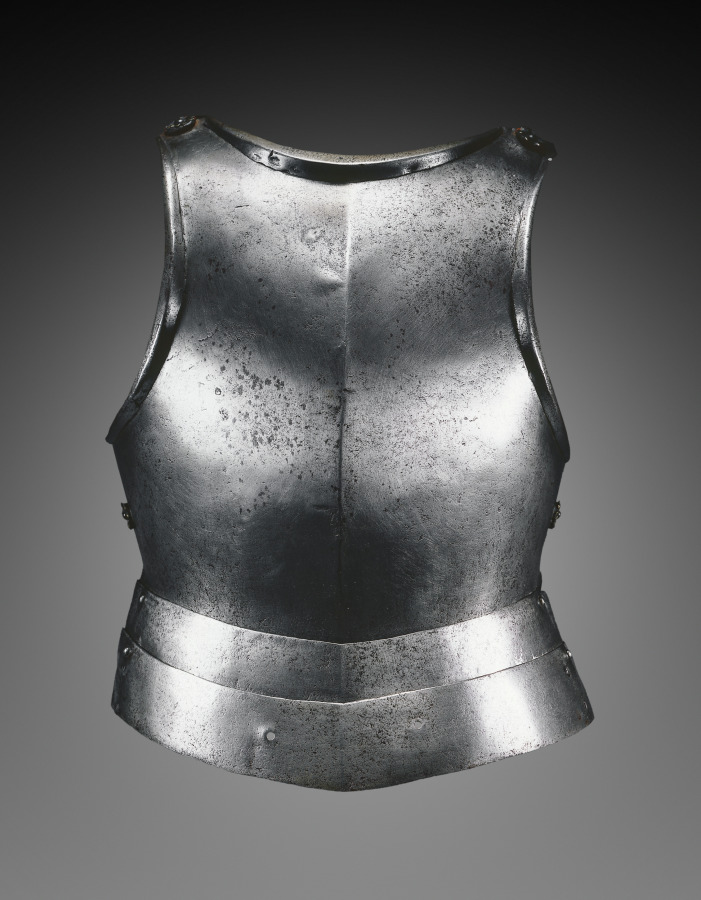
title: Gothic Breastplate and Taces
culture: North Italy, late 15th Century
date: c. 1475–1500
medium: steel with brass rosette rivets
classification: Arms and Armor